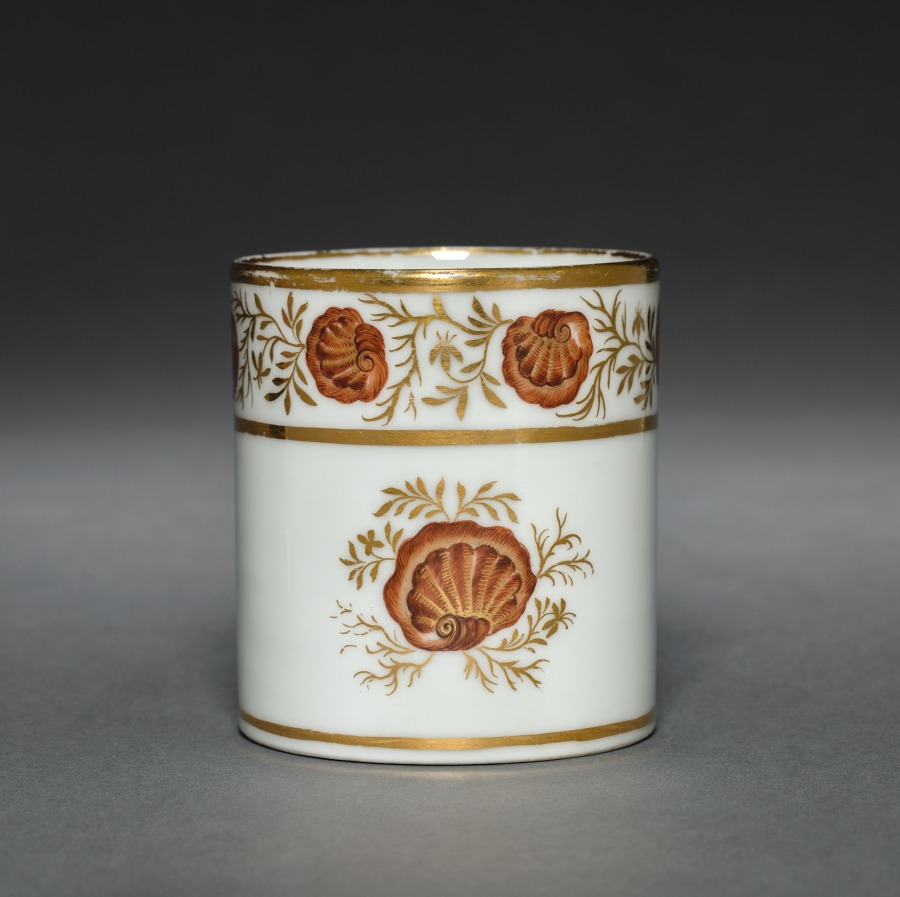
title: Cup from Oliver Wolcott, Jr. Tea Service (2 of 6)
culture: Chinese Export porcelain, late 18th-early 19th century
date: 1785–1805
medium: porcelain, sepia enamel, gold leaf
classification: Ceramic